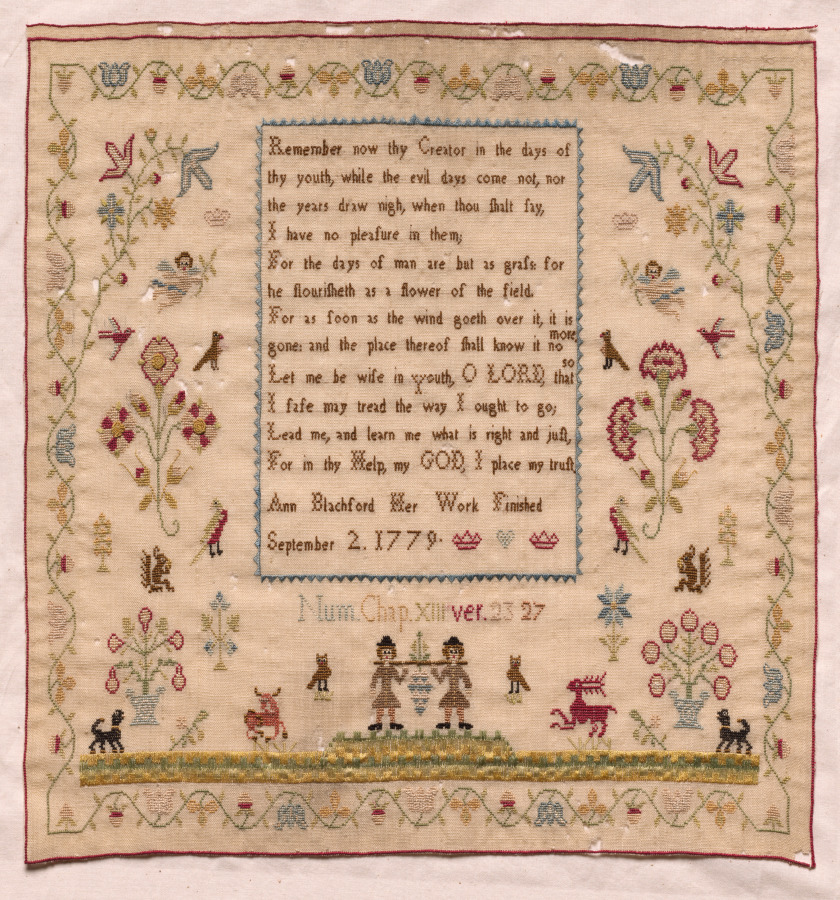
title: Sampler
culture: England, late 18th century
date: 1779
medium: embroidery; silk on woolen canvas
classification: Sampler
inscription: "Remember now thy Creator in the days of/ thy youth while the evil days come not, nor/ the years draw nigh, when thou fhalt fay,/ I have no pleafure in them;/ For the days of man are but as grafs for/ he flourisheth as a flower of the field./ For as foon as the wind goeth over it, it is/ gone and the place thereof shall know it no more./ Let me be wife in youth, O LORD, so that/ I fafe may tread the way I ought to go;/ Lead me, and learn me what is right and juft,/ For in thy Help, my GOD, I place my truft./ Ann Blachford Her Work Finished/ September 2, 1779./ Num. Chap. XIII ver. 23 27."